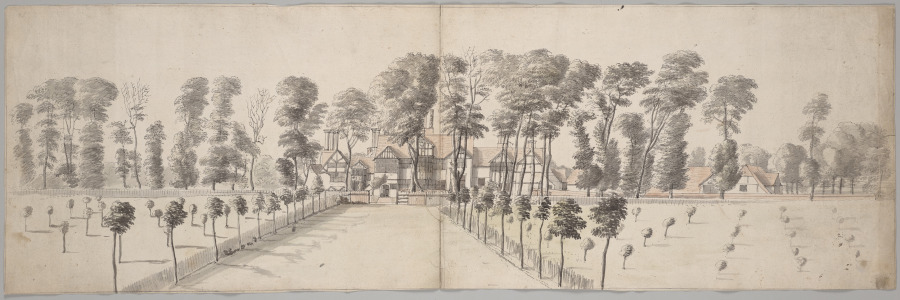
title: The Manor House, Cresswells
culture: Netherlands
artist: Hendrick Danckerts (Dutch, 1625–1680)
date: c. 1665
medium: Pen, ink, wash with watercolor on two conjoined pieces of paper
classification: Drawing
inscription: Watermark: Strasburg Bend & Lily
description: The Anglo-Dutch painter, Hendrick Danckert, made this panoramic view of the manor house at Cresswells, Bray, in Berkshire, England around 1670. The drawing was preparatory for a painting of the house, presumably commissioned by its owner, Henry Somerset, 1st Duke of Beaufort. The genre of topographical painting that flourished in England beginning in the 17th century accompanied the building boom after the Restoration (1660), which was funded in large part by the American colonies. Many Dutch artists, trained in landscape painting in their native country, emigrated to England to meet the demand. Danckerts was among the first to incorporate watercolor into his drawings, a genre that would flourish in England in the following centuries.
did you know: The timber-framed house depicted here was built in the fifteenth century and demolished in the eighteenth century.